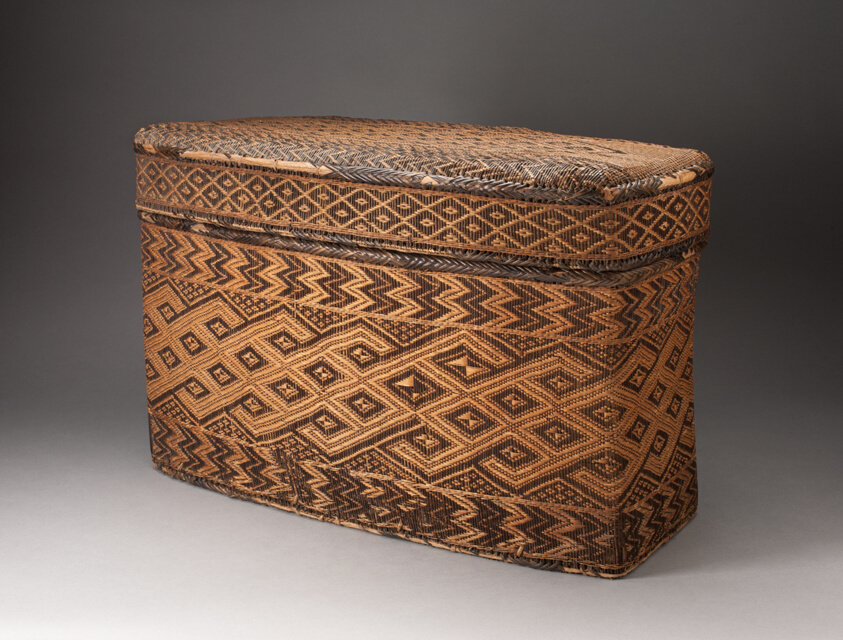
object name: Basketry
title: Container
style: Central Africa, Arts of Africa, african Art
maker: Kongo; Angola, Democratic Republic of the Congo, or Republic of the Congo; Central Africa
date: 18th/19th century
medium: Rattan, wood, and twine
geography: Angola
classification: container; arts of Africa; basketry; african art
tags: basketry, storage, geometric, household, luxury